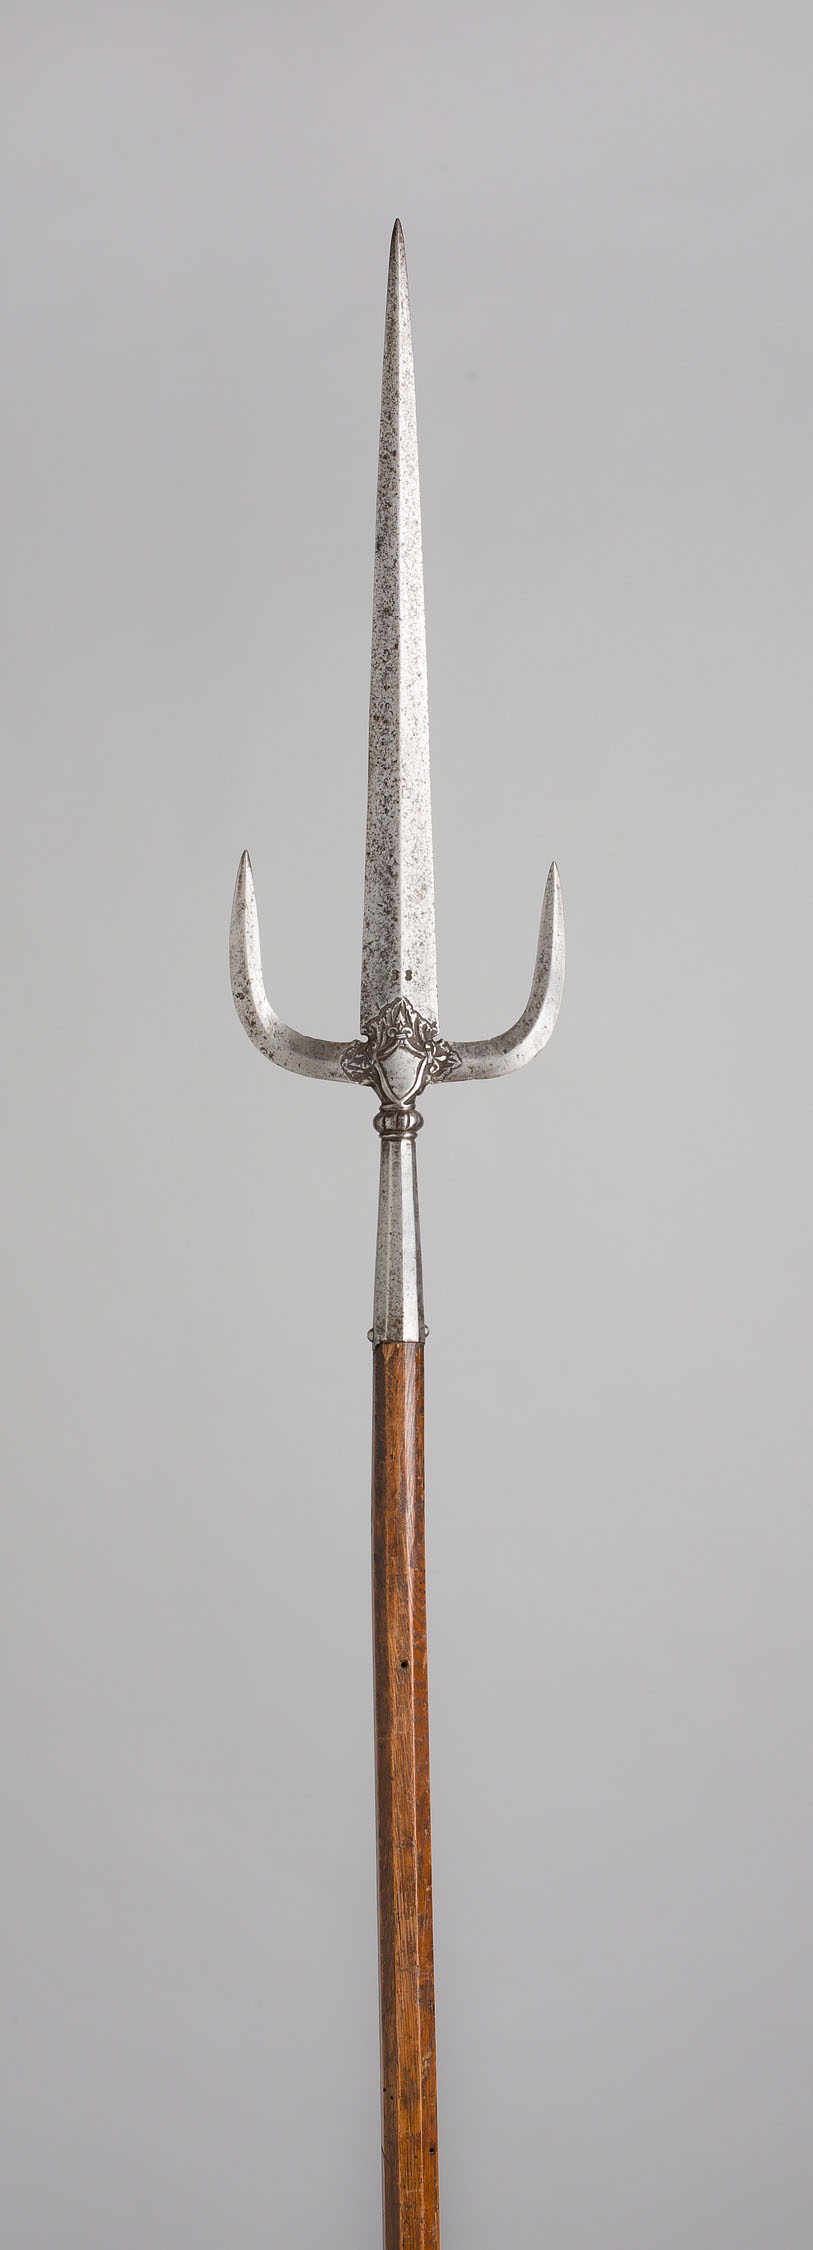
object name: Arms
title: Military Trident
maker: Italian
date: 1530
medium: Steel and wood (oak)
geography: Italy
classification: edged weapon-staff; arms; arms and armor